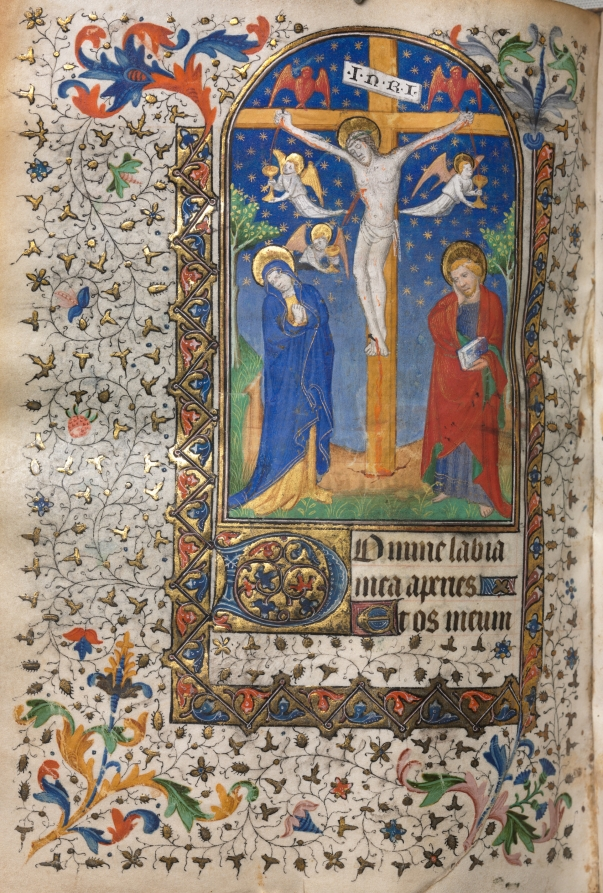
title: Book of Hours (Use of Paris): Crucifixion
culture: France, Paris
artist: follower of Boucicaut Master (French, Paris, active about 1410–25)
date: c. 1420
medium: ink, tempera, and gold on vellum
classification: Bound Volume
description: The Guise Master-named after the book of hours he illustrated for François de Lorraine, Duke of Guise-developed his style from the more dominant Parisian workshop of the Boucicaut Master.